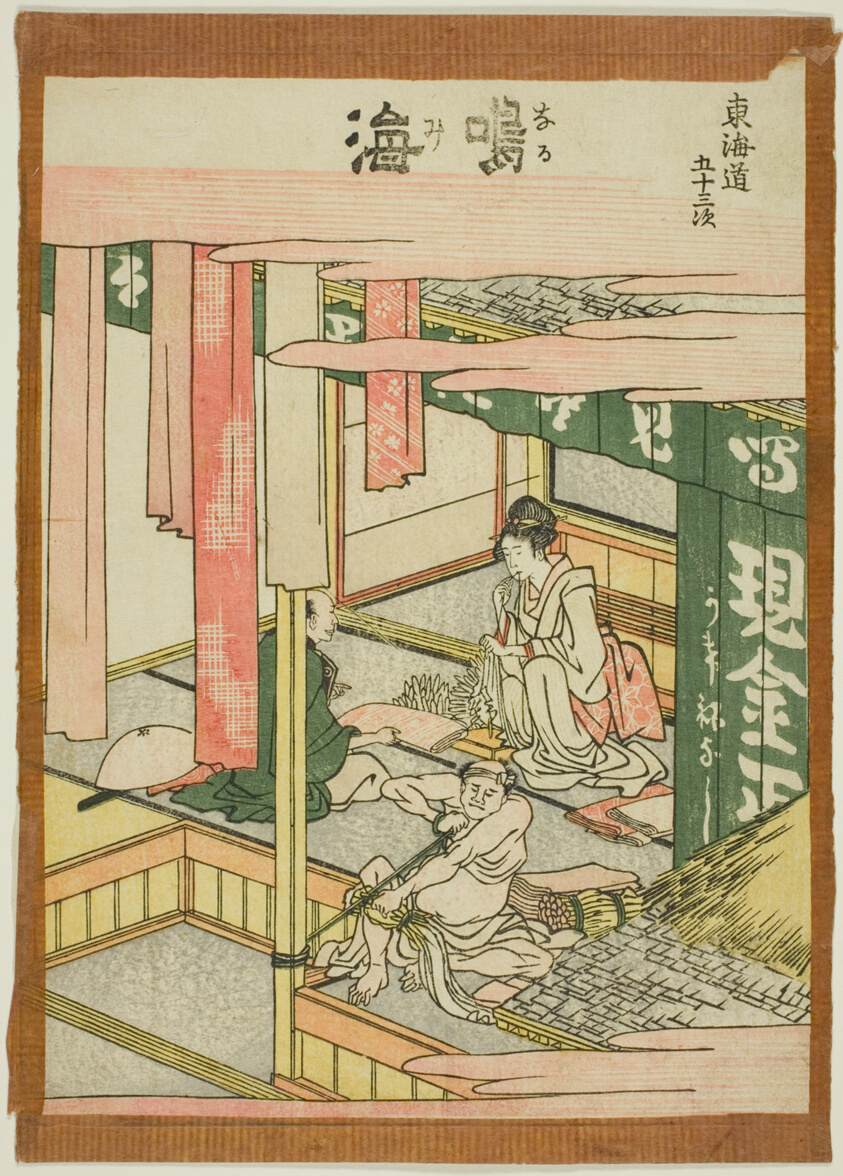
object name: Print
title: Narumi, from the series "Fifty-three Stations of the Tokaido (Tokaido gojusan tsugi)"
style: Japanese (culture or style)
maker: Katsushika Hokusai 葛飾 北斎; Japanese, 1760-1849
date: c. 1806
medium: Color woodblock print; chuban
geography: Japan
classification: woodblock print; print; asian art